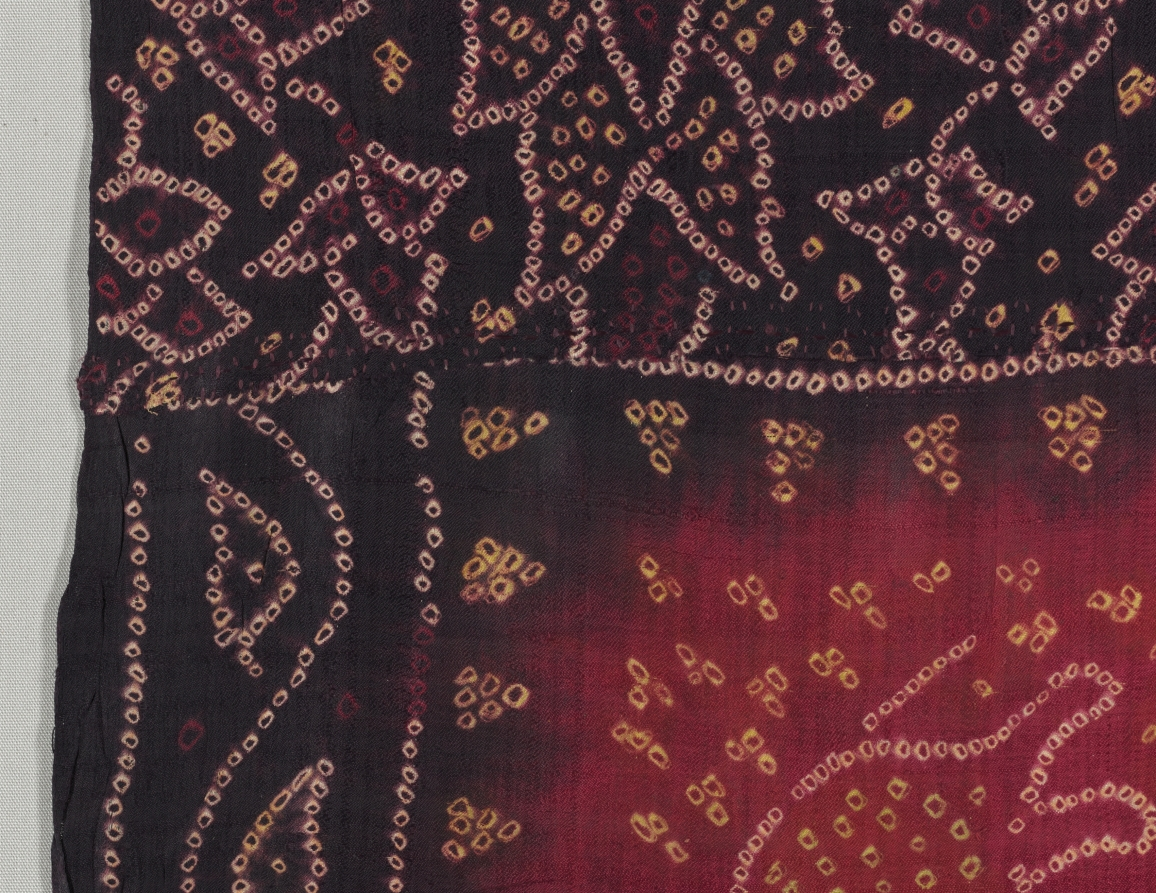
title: Sari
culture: India, Gujarat, 19th century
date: 1800s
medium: satin, tied and dyed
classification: Textile